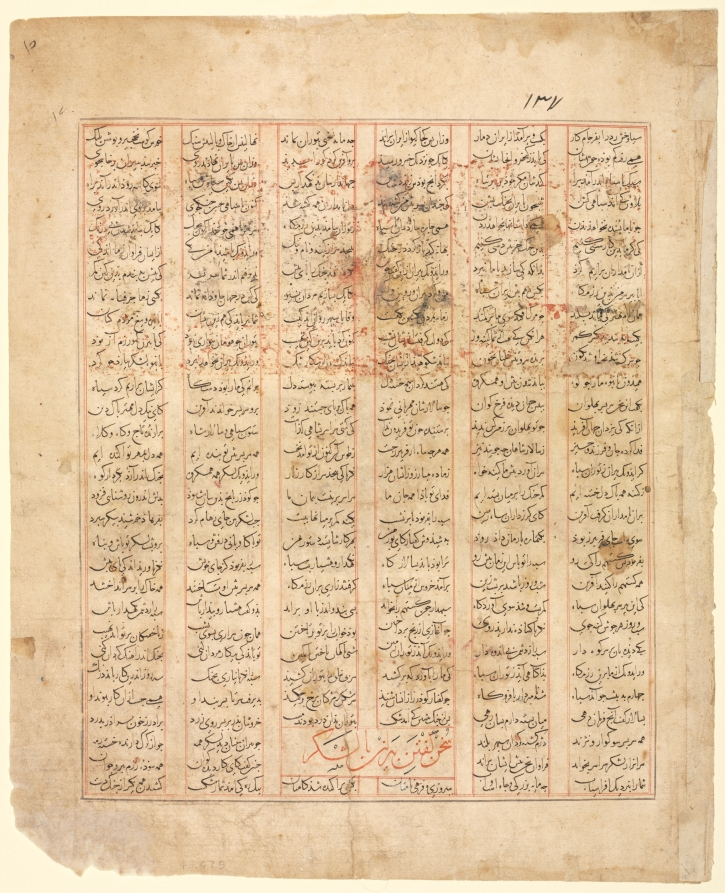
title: The Tale of the Twelve Faces. "Bizhan Addresses the Army": Illustration from the Firdausi Shahnama (recto)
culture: Iran, Shiraz, Inju (Il-Khanid), 14th Century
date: 1341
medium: opaque watercolor and ink on paper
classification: Manuscript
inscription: Script: Naskh